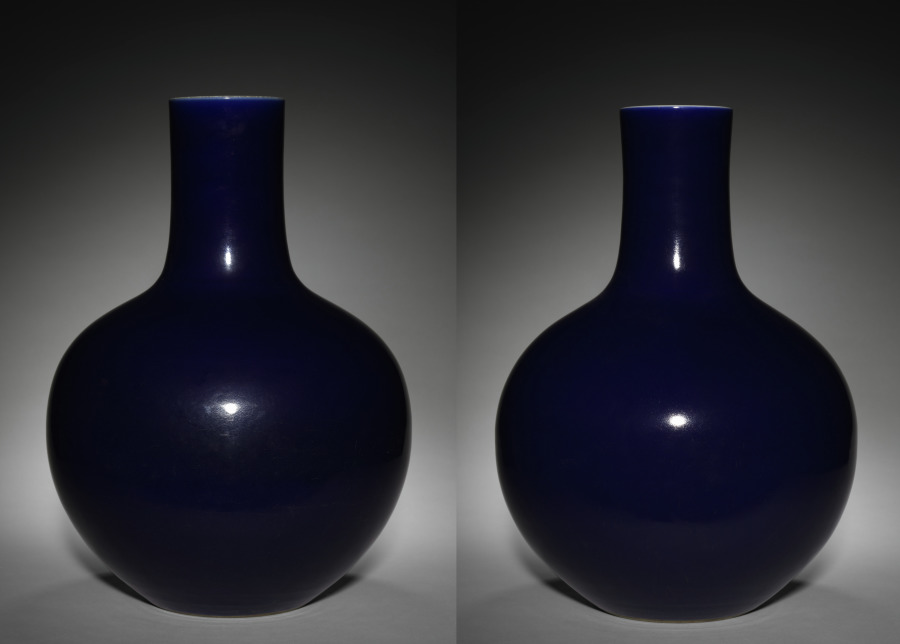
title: Pair of Blue Bottle Vases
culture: China, Qing dynasty (1644-1911), Qianlong mark and reign (1736-95)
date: 1736–95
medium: porcelain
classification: Ceramic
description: In the Qing dynasty (1644–1911), luxury items became more affordable to larger parts of the society, including women, merchants, and literati in nonofficial positions. Imperial patronage and a growing urban population encouraged consumption of luxury goods and local craftmanship. This pair of blue bottle vases exemplify the technical perfection of Qing dynasty court artisans who surpassed their predecessors in technical skill.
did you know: The vase's neck was made separately and subsequently attached to the body.